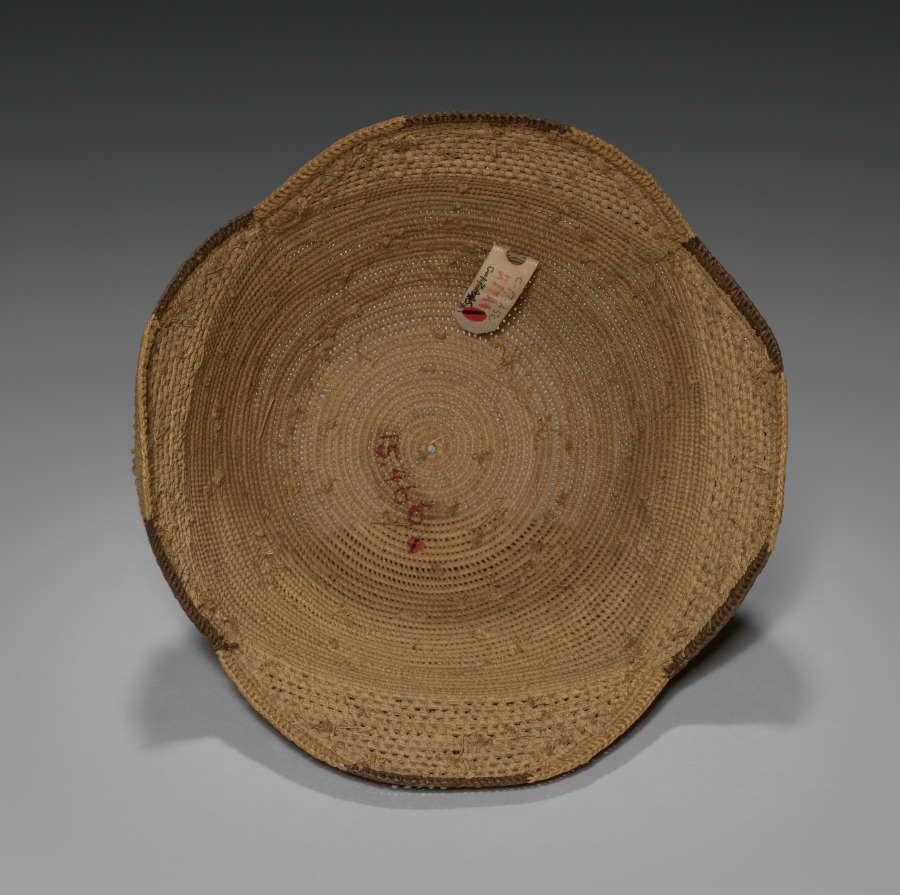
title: Hat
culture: Africa, Central Africa, Democratic Republic of the Congo, Kuba-style maker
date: early 1900s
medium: Raffia and dye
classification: Garment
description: Titled Kuba men and prominent women wear the laket, a small ornate dome-shaped hat. An essential fashion item of adult men in good social standing, it focuses special attention on the head as a significant marker of individual identity, ethnic affiliation, status, and role in society. This prestige object is secured on the crown of the head with a nine-and-a-half-inch metal pin that pierces through the hat onto a clump of hair. The laket is made from undyed raffia palm fiber that was then coiled into threads and woven. There are two examples of the laket: the plain type with the flat top, and the more elaborate type called the laket mishiing.